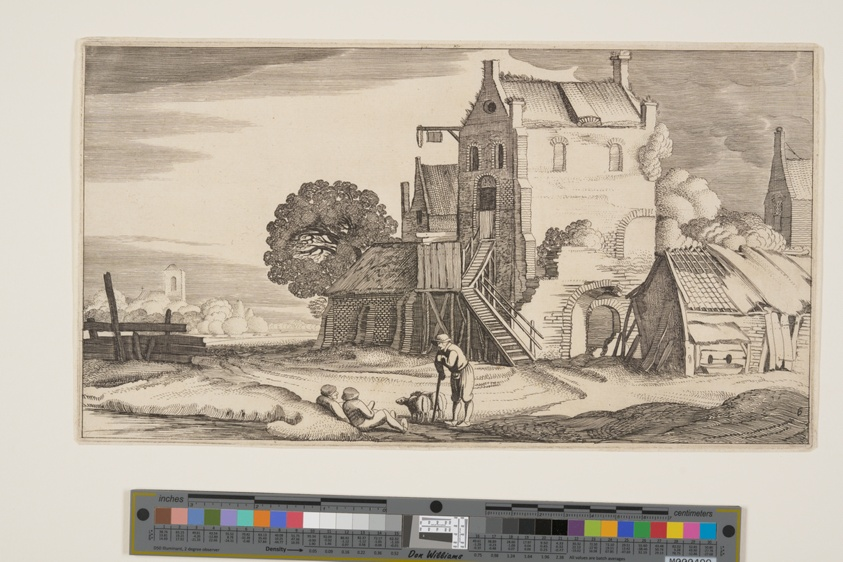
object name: Print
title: Three Figures in Conversation Near an Inn, from Landscapes (Playsante Lantschappen)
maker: Attributed to Claes Jansz. Visscher II (Dutch, 1586-1652); after Jan van de Velde II (Dutch, c. 1593-1641)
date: c. 1641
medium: Etching, with engraving, on ivory laid paper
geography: Netherlands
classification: etching; paper; print; prints and drawing